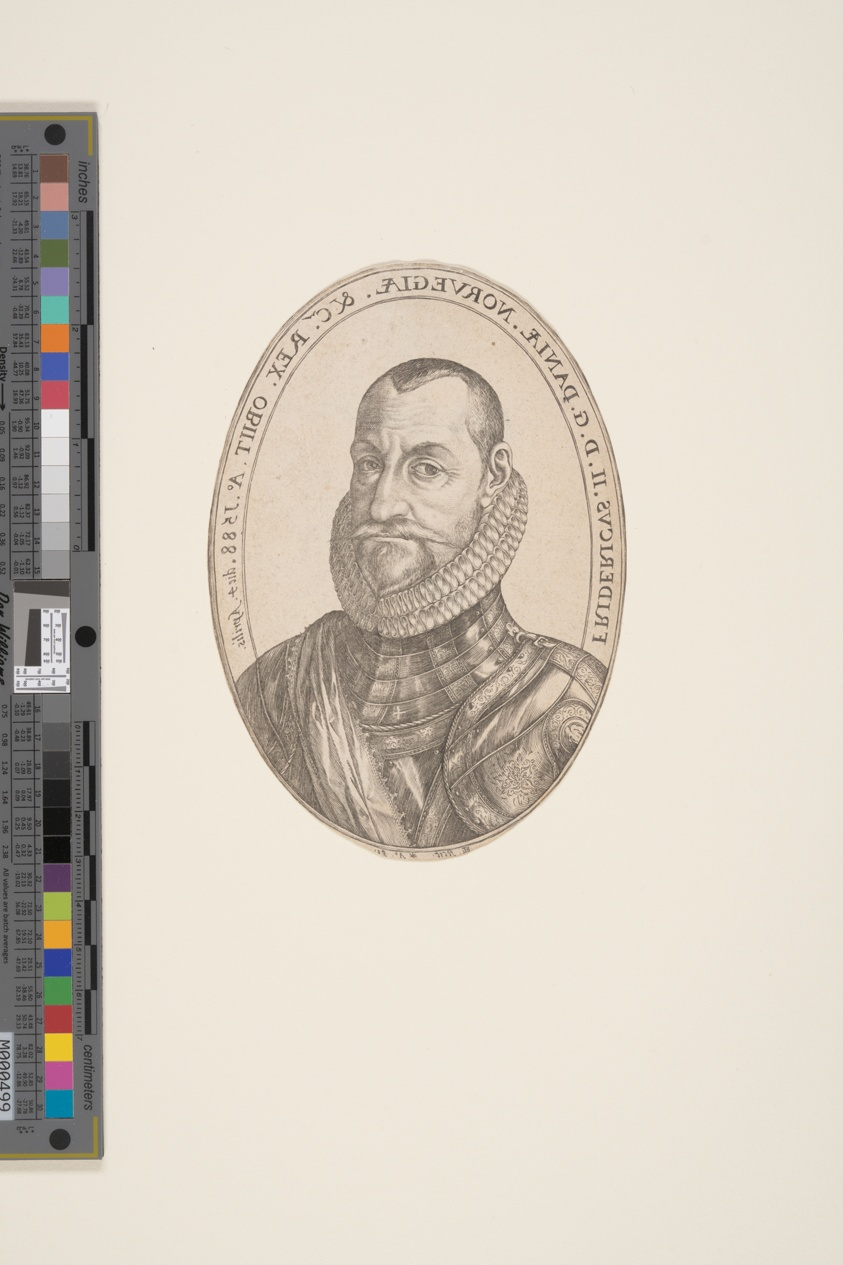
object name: Print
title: Frederick II, King of Denmark and Norway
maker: Hendrick Goltzius (Dutch, 1558–1617)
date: 1590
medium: Counterproof of an engraving on laid paper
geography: Netherlands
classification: engraving; paper; print; prints and drawing